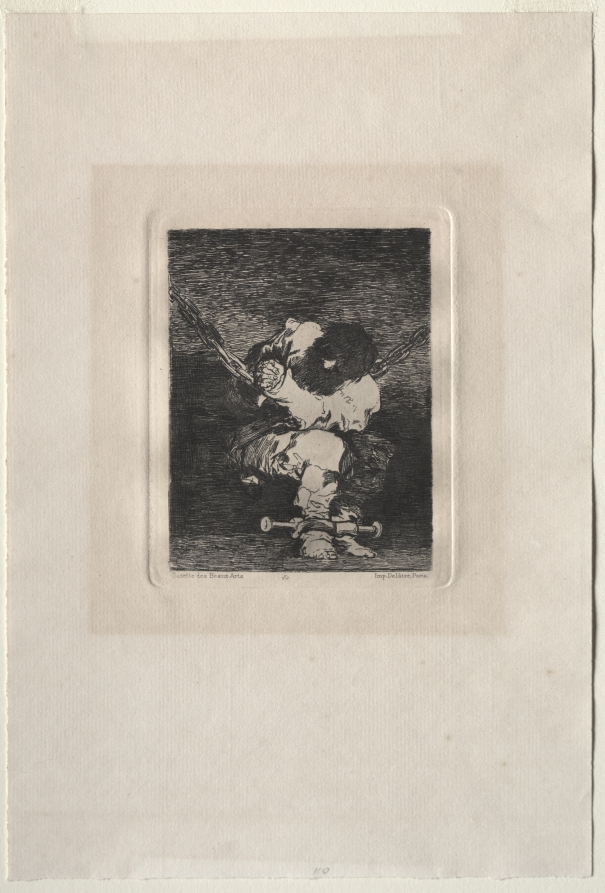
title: Little Prisoner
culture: Spain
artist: Francisco de Goya (Spanish, 1746–1828)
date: 1867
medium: etching and engraving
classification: Print